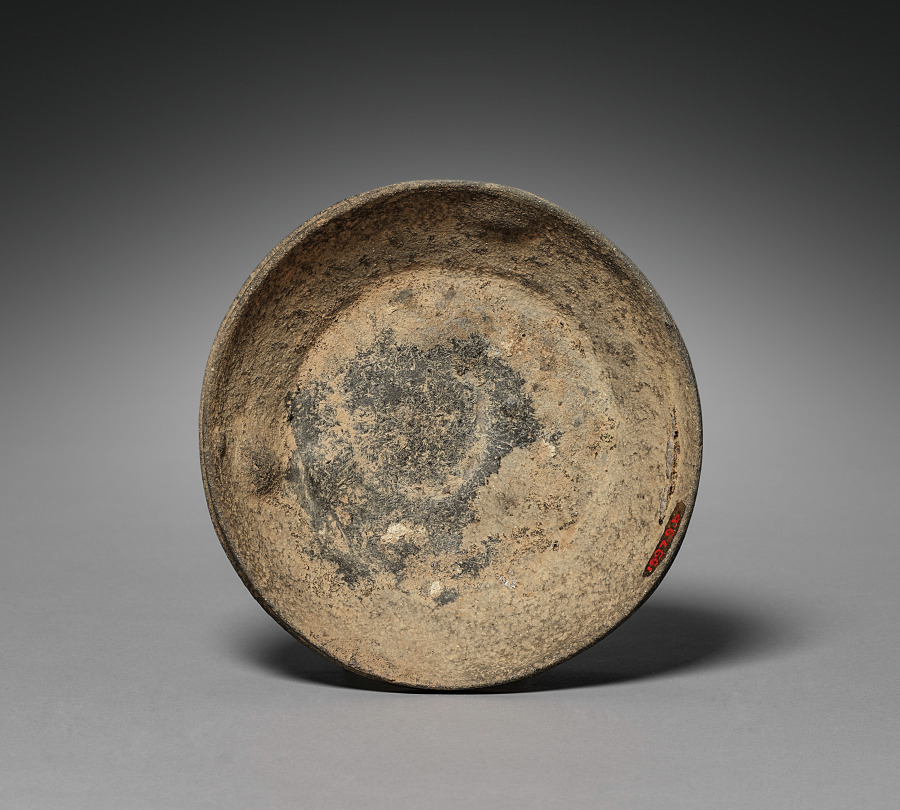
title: Lidded Cup with Strap Handles (lid)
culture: Korea, Gaya period (42–562 CE)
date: 300s–400s CE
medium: stoneware with natural ash glaze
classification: Ceramic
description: Pottery vessels with a footed stand such as this one is the earliest known high-fired ware. Its gray color is the result of the reduction of oxygen in the closed kiln chamber. Footed vessels were not for everyday usage, but rather served to present offerings to the deceased.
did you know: This is a lid for a ritual pottery vessel.